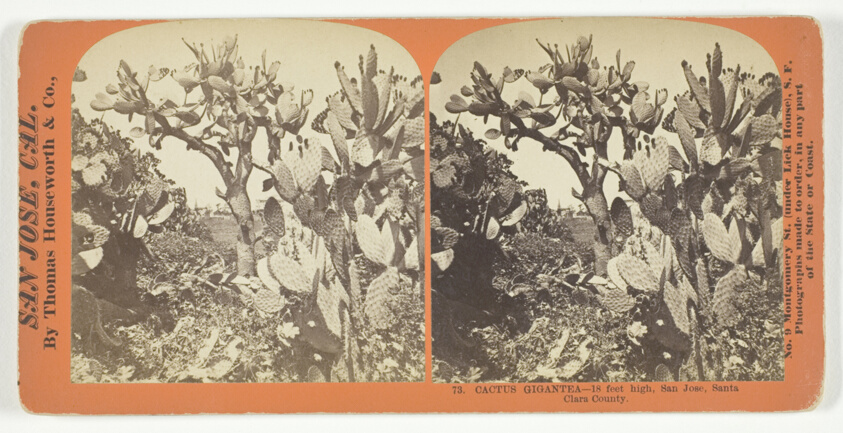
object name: Photograph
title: Cactus Gigantea - 18 feet high, San Jose, Santa Clara County, No. 73 from the series "San Jose, Cal."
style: 19th century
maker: Thomas Houseworth & Co.; American, 1828–1915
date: c. 1868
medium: Albumen print, stereo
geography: United States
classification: stereograph (albumen); albumen silver print; photographic process; photography; photograph